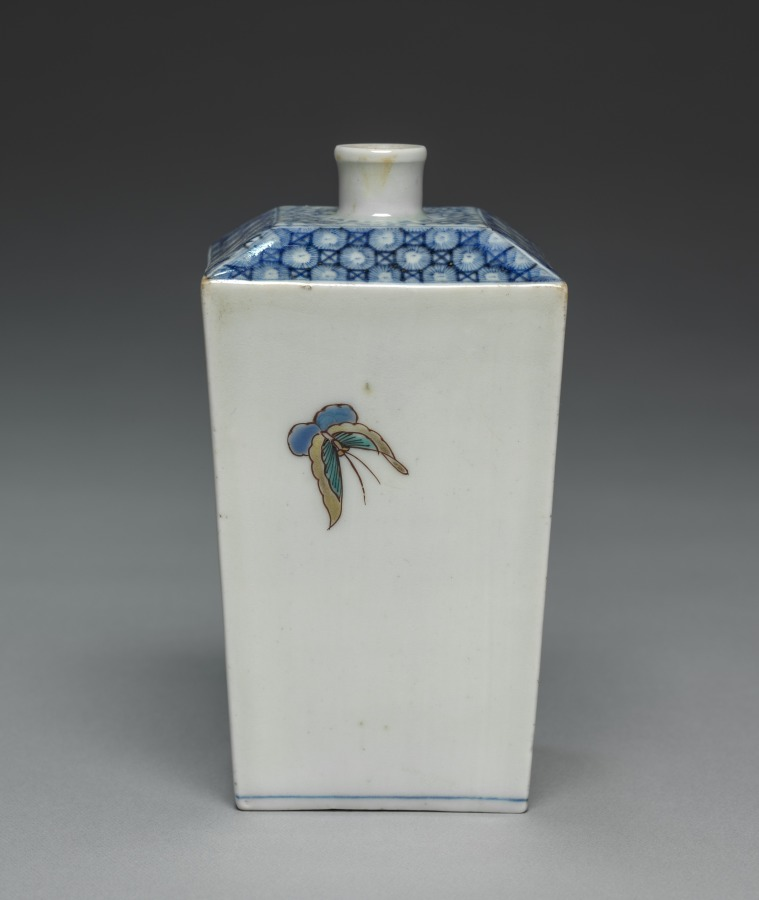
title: Bottle with Bird and Butterfly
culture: Japan, Edo period (1615–1868)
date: late 1600s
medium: porcelain with underglaze blue and overglaze color enamel and gold (Hizen ware, Ko-Imari type)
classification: Ceramic